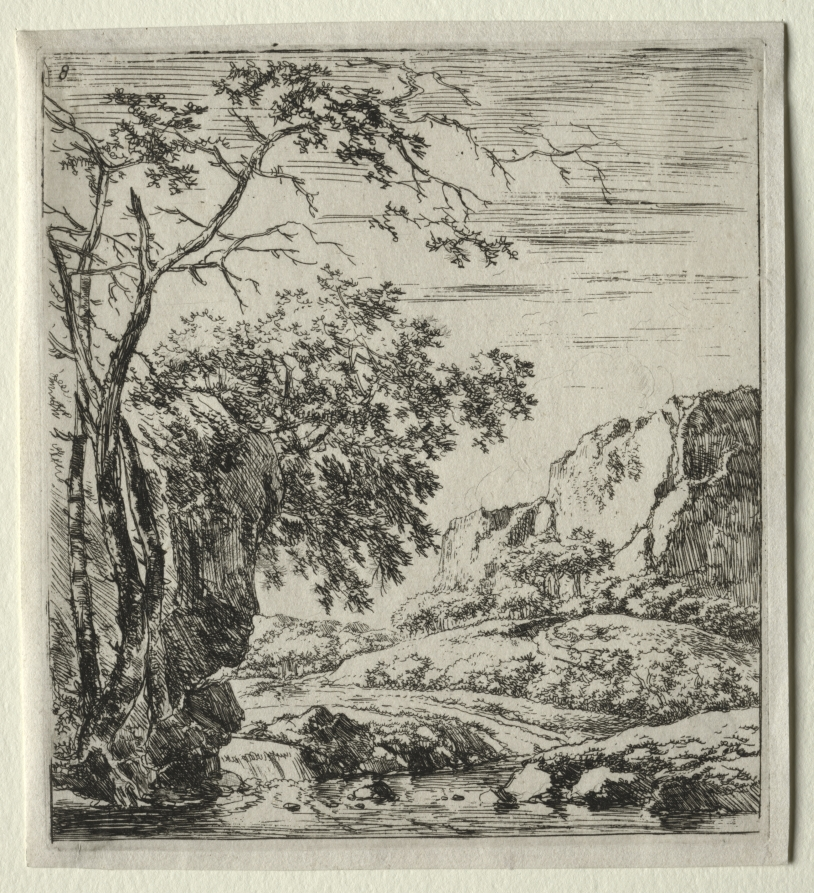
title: Les trois arbres près du rocher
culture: Flanders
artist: Herman Naiwincx (Flemish, c. 1624–after 1651)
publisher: Claude de Jongh (Dutch, c. 1600–1663)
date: 1640–51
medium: engraving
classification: Print